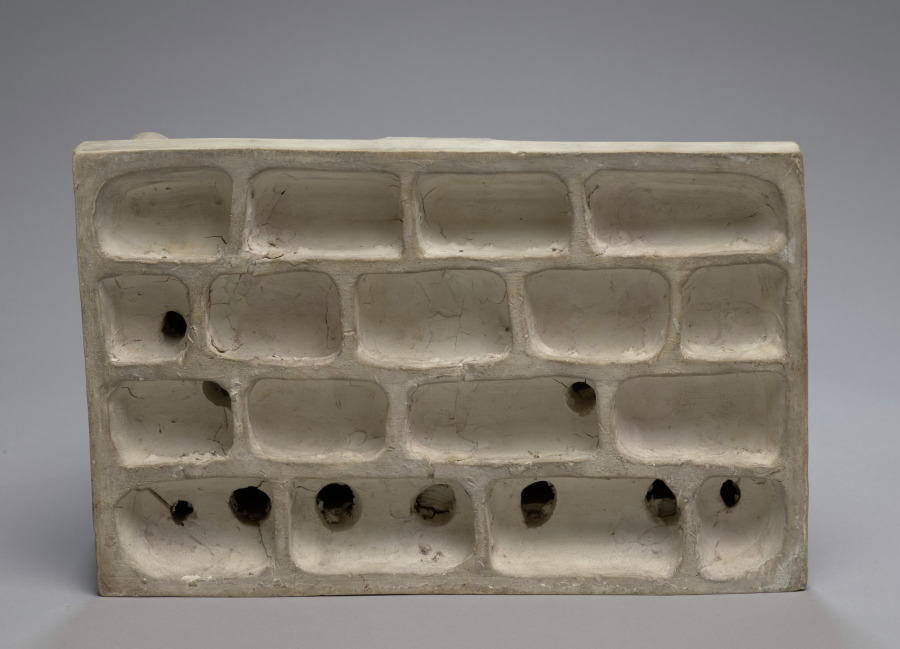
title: The Cobbler and His Bird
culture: France, Bellevue near Toul, late 18th century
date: late 1700s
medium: earthenware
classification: Ceramic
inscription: incised inscription on back of base: "Bellevue van de Toul."